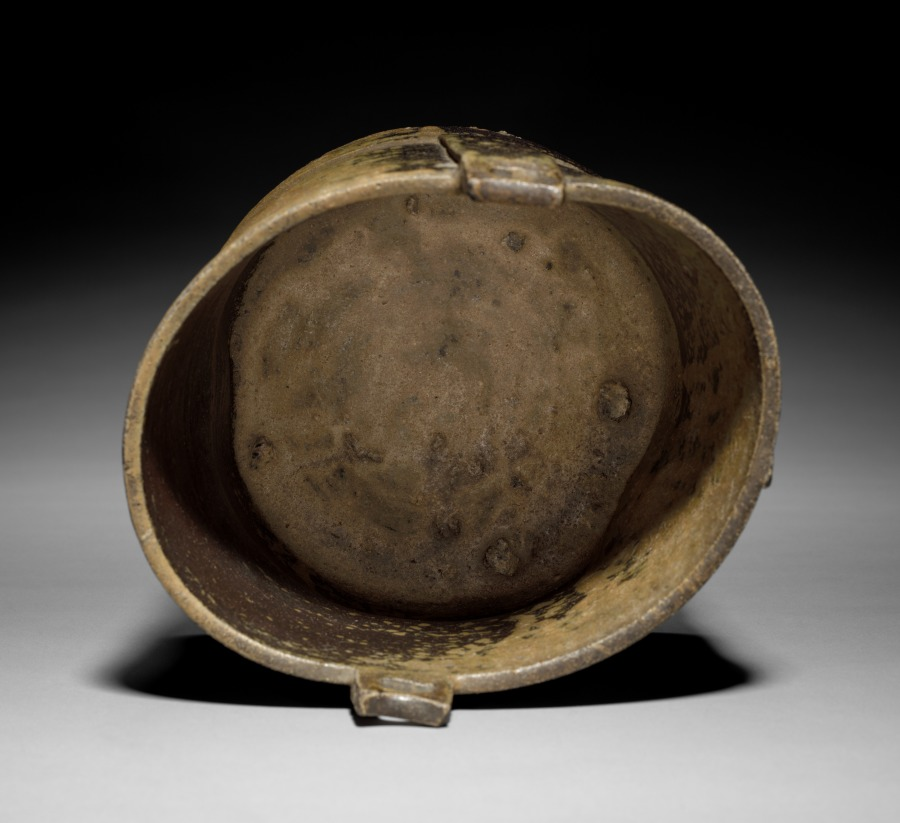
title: Water Container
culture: Japan, Momoyama period (1573–1615)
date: early 1600s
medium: glazed stoneware (Bizen ware, Imbe type)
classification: Ceramic